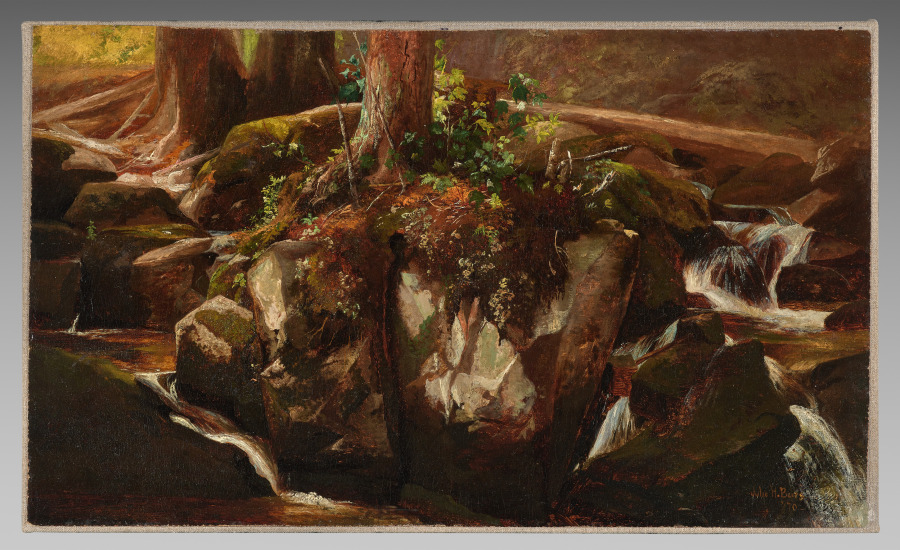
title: A Mountain Stream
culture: America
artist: Julie H. Beers (American, 1835–1913)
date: 1870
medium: oil on canvas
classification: Painting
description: At a time when women faced many barriers, Julie H. Beers became one of the first women from the United States to have a successful career as a landscape painter. In addition to selling her work, she earned income by organizing instructional outdoor sketching trips for women in upstate New York and New England. Although its location was not recorded, A Mountain Stream was likely painted on her summer trip to New Hampshire’s White Mountains in 1870. Rendered close-up from a low vantage point, its intimately scaled composition features tree roots, angled boulders, patches of moss, pockets of vegetation, and gentle cascades of water.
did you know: Julie H. Beers learned how to paint from two of her brothers, William Hart and James McDougal Hart, whose works are also in the museum's collection.